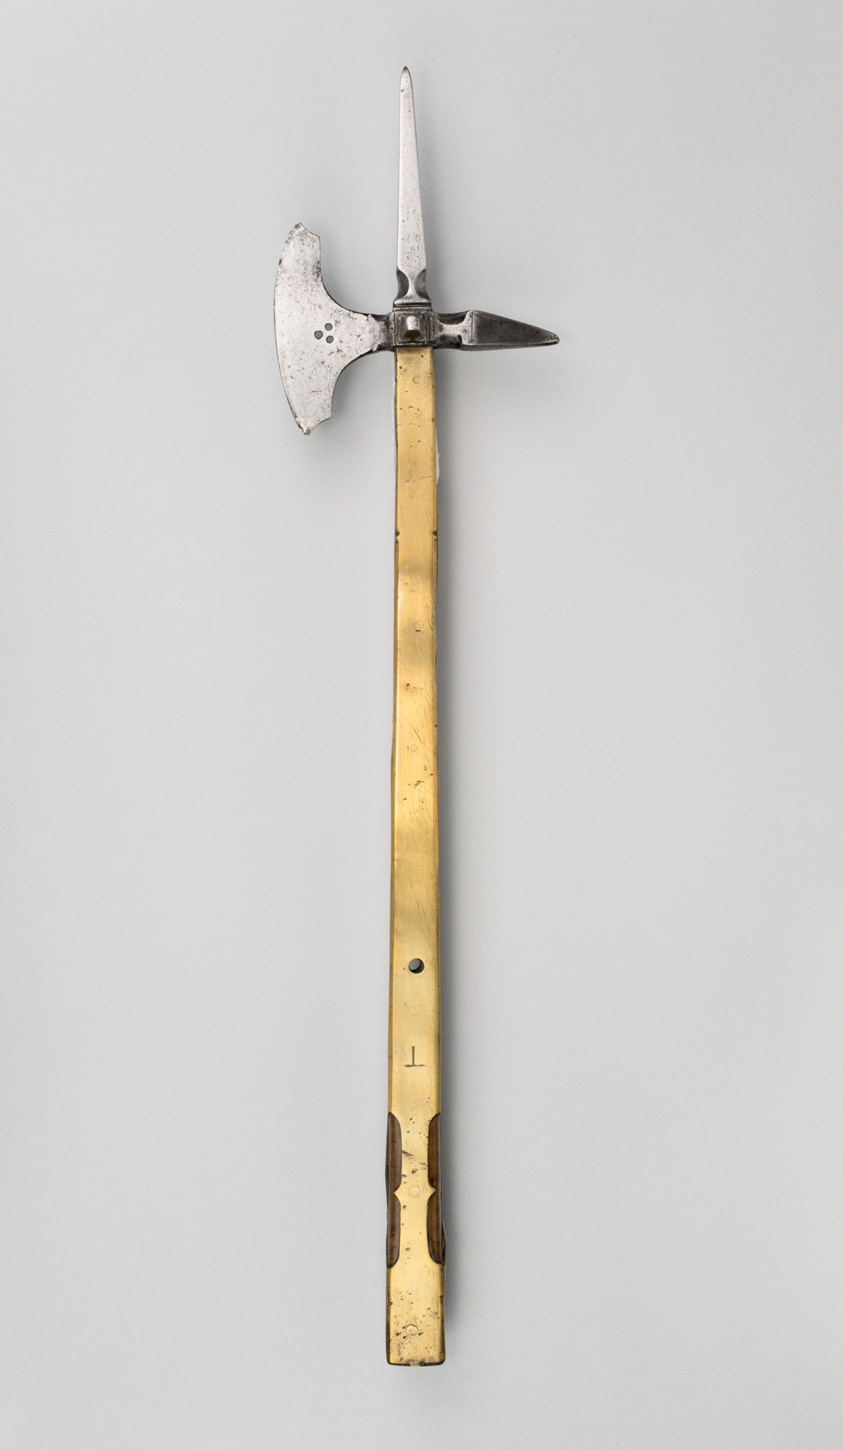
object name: Arms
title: Horseman's Axe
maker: German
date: 1500/25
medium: Steel, iron, brass, beechwood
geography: Germany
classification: edged weapon-staff; arms; arms and armor